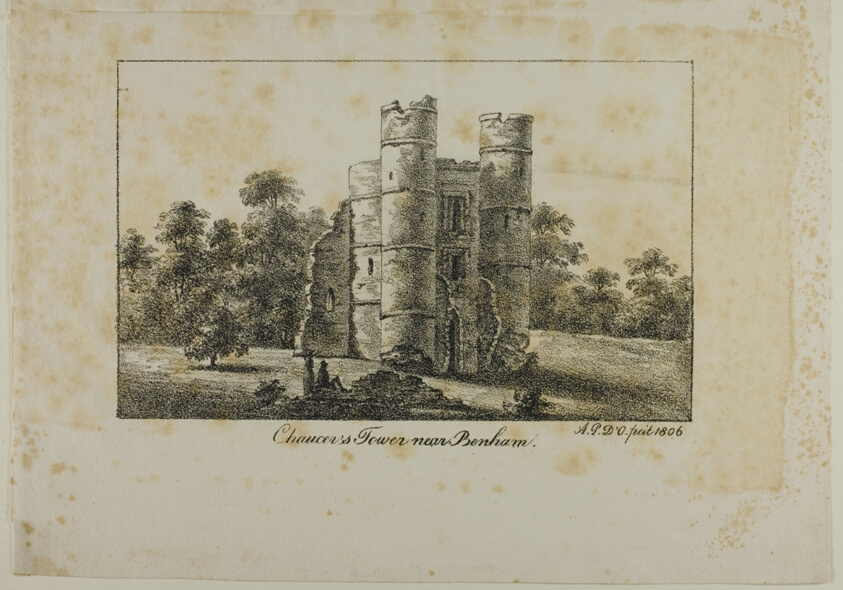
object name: Print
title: Chaucer's Tower Near Benham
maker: Antoine Philippe d'Orléans (French, 1775-1807)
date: 1806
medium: Two lithographs in black on cream wove paper, printed on the same sheet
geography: France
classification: lithograph; print; prints and drawing